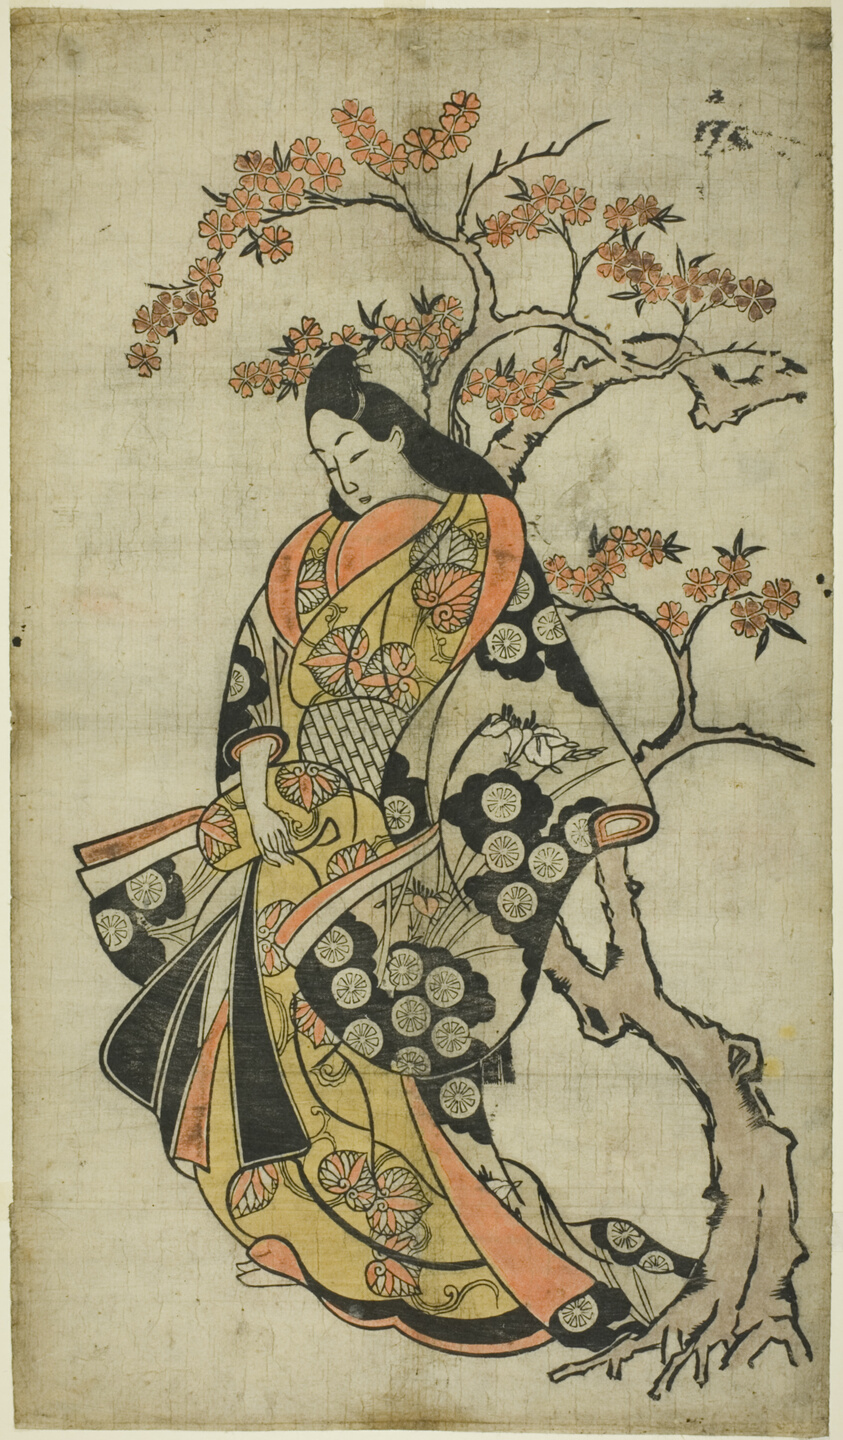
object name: Print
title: Woman Beside a Cherry Tree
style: Japanese (culture or style)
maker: Artist unknown; Japanese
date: c. 1688/90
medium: Hand-colored woodblock print; vertical o-oban, tan-e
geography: Japan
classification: woodblock print; print; asian art